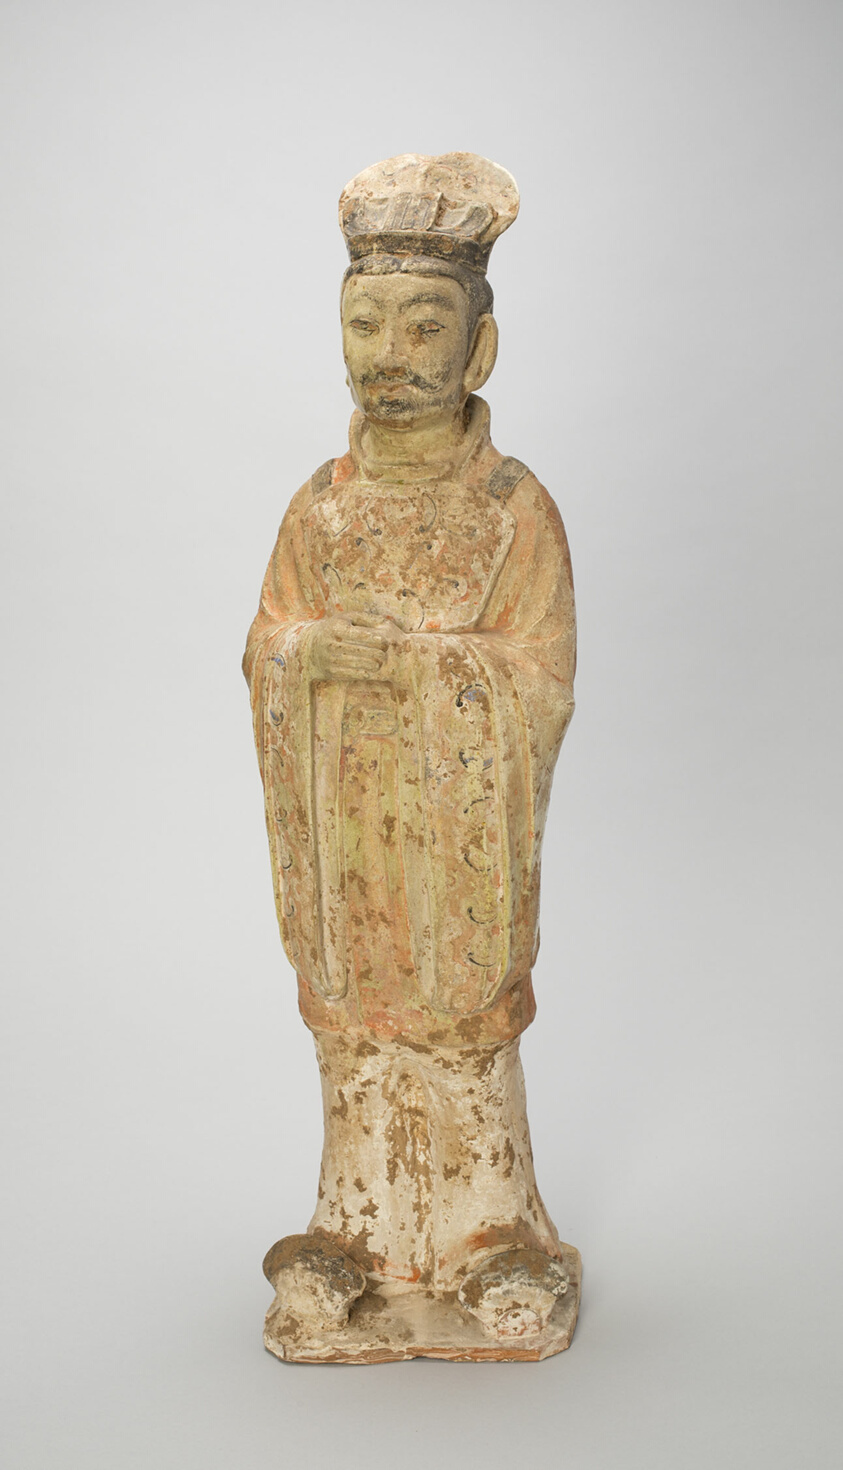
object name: Sculpture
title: Standing Court Official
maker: China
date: Style of Tang Dynasty (618–907) with later painted detail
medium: Earthenware with painted decoration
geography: China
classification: earthenware; ceramics; asian art; sculpture